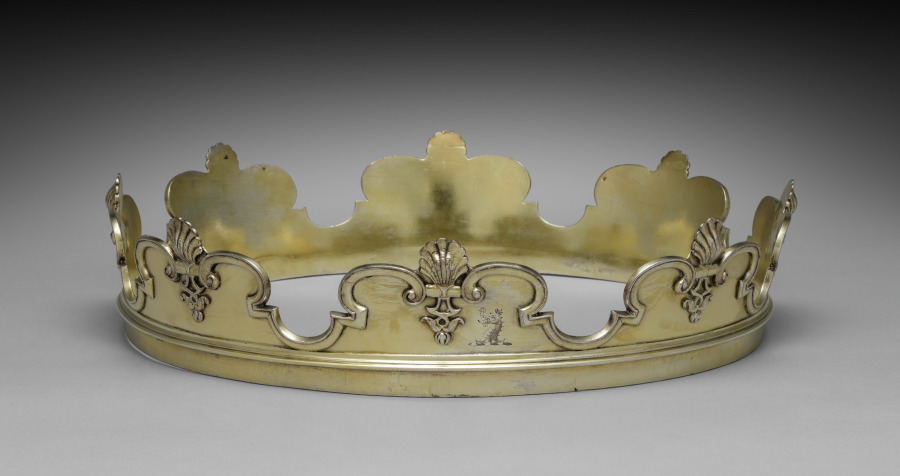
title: Rim for a Monteith Bowl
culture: England, London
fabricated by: Benjamin Pyne (English, active 1693–1727)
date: 1715–16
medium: silver gilt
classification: Silver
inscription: engraved, center of bowl: arms, crest of Byam family (mantling and helmet were probably engraved at time bowl was made, crest and arms were altered to those of Byam at later date). Rim engraved with Byam Crest (also presumably not original).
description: This bowl’s notched rim allows for glasses to be suspended in water for cooling and cleansing between courses during a long dinner. The rim can be removed and the bowl used for punch as well. A year before Benjamin Pyne began this bowl, he was appointed Subordinate Goldsmith to the King in preparation for George I’s coronation (r. 1714–1727). Like much of his work, this Monteith bowl is characterized by its scale and simplicity.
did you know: The name Monteith is said to come from a mythical Scotsman named Monteigh, who wore cloaks with a similar notched pattern.